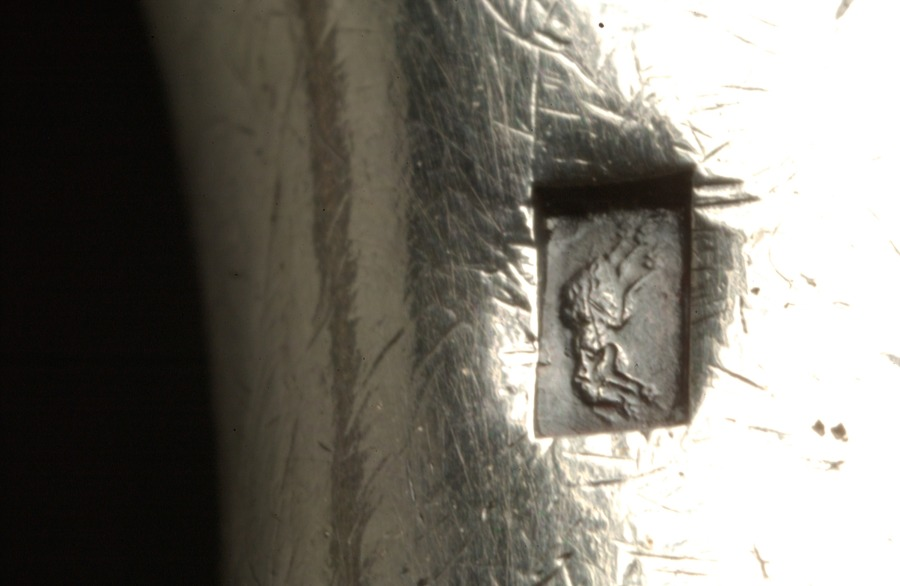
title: Covered Tureen on Stand (Pot à oille)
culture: France, late 18th-early 19th Century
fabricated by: Henry Auguste (French, 1759–1816)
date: 1797–98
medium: silver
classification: Silver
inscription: [Coat-of-arms of Amoral don Federico Carlos Gravina on bowl; cover; stand]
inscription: [Assay mark for large-sized work, 1798-1809, lining exterior; tureen foot exterior]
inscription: [Assay mark for medium-sized work, 1798-1809, beneath stand foot; on edge of cover]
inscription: [Maker's mark of Henri Auguste, master silversmith in 1785, beneath tureen foot; beneath stand foot; inside stand foot edge]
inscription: [Official assay mark for first standard silver, Paris, 1798-1809, beneath stand foot; lining exterior; on cover]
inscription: [Official mark for silver imported from countries with customs conventions, 1838-1912, beneath stand foot; edge of cover; tureen lip exterior; lining exterior; on one tureen handle; outside stand foot; tureen foot exterior]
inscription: [Unknown mark, possibly Ceres' profile in square with "E" and "7", beneath stand foot; on cover; rim of lining; tureen foot exterior; tureen lip exterior]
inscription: [Unofficial assay mark for first standard silver, Paris, 1794-1797, beneath foot stand; beneath tureen foot; near tureen handle exterior]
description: This pot-à-oille was designed by master goldsmith Henri Auguste after drawings by draftsman and sculptor Jean Guillaume Moitte. Though many of the neoclassical decorative elements on this piece are pulled from Moitte’s design, Auguste’s final product leaves out much of the proposed ornamentation. Instead this object finds distinction in its large size and smooth expanses of silver that emphasize the purity of its lines.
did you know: The coat of arms on the body of the work corresponds to the family of Federico Carlos Gravina, a Sicilian-Spanish admiral who was known to have had a close diplomatic relationship with Napoleon I.